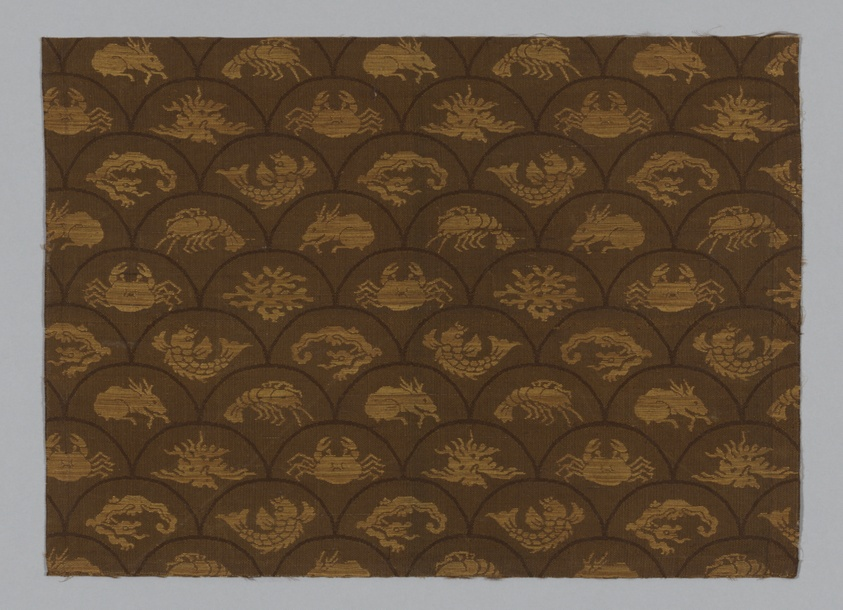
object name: Sculpture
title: Fragment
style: edo (japanese period)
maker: Japan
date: Edo period (1615–1868), 1675/1725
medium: Fancy compound cloth, silk and gilt paper; 3 strips to m.m.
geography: Japan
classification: textile; weaving; sculpture